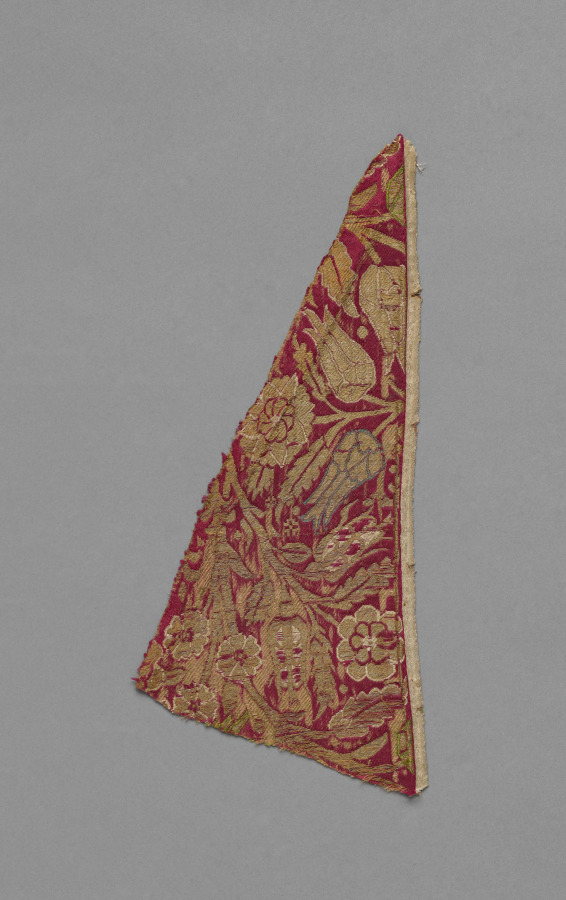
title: Textile Fragment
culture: Turkey, Bursa, 16th century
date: 16th century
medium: brocaded silk with metal thread weft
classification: Textile